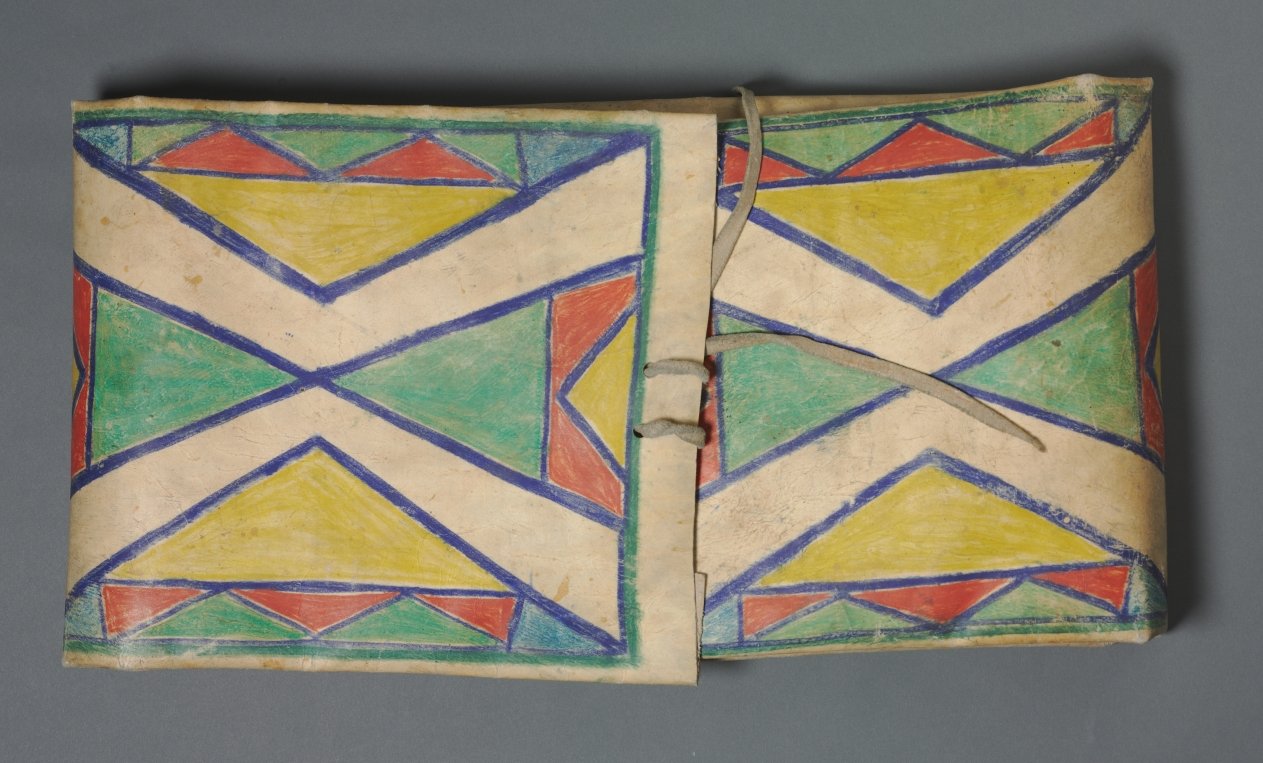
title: Parfleche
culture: America, Native North American, Plains, Apsaalooke (Crow), Post-Contact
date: c. 1900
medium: painted leather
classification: Leather